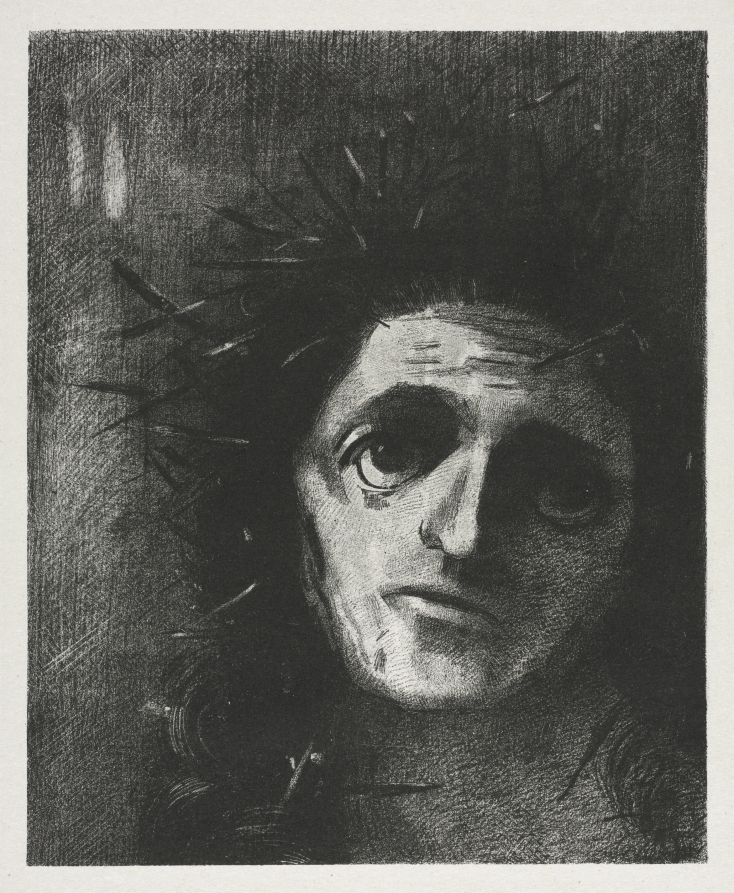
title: Christ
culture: France, 19th century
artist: Odilon Redon (French, 1840–1916)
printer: Lemercier & Cie.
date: 1887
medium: lithograph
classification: Print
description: Odilon Redon's unusual depiction of a melancholy, beardless Christ uses the dramatic tonality of lithography to convey the figure's suffering. Redon drew parallel lines with a lithographic crayon and then scraped some of the material away to depict the angular forms of an oversized crown of thorns and the surrounding dreamlike space. Redon experimented with lithography and preferred it for its ability to produce the rich and evocative black seen here.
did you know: Odilon Redon believed that black was an agent of the spirit and created nearly 200 monochromatic lithographs that evoke a mysterious and dreamlike world.